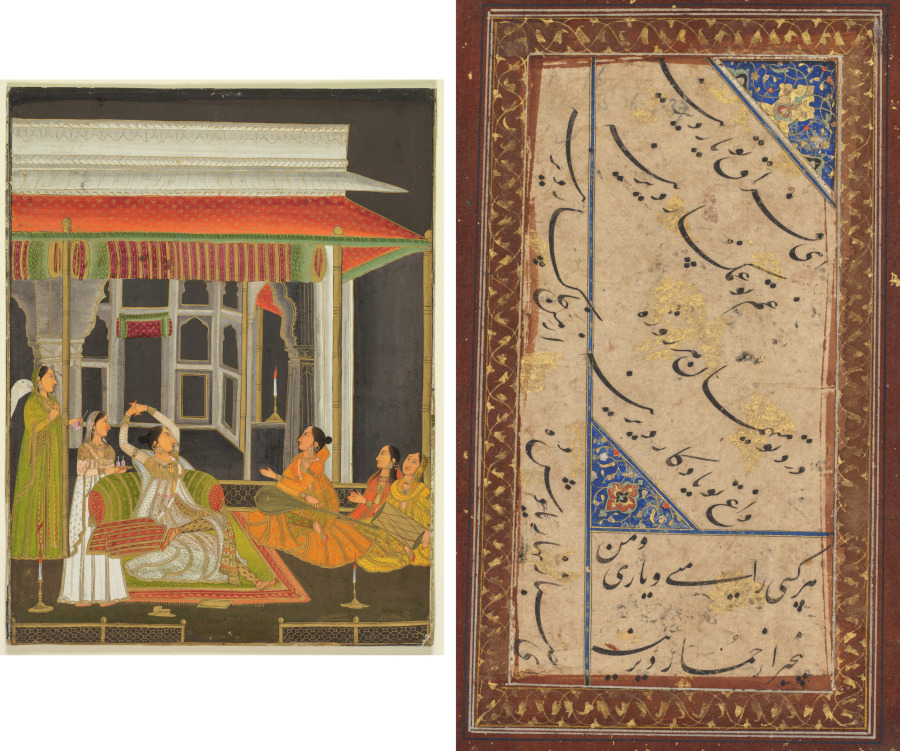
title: A princess on a terrace with attendants at night (recto); Calligraphy (verso)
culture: India, Farrukhabad, Mughal, 18th century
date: c. 1760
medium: Gum tempera, ink, and gold on paper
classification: Painting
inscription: verso: six lines of Persian poetry in nast 'aliq calligraphy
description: Before a terrace pavilion in the women’s quarters of a palace, a royal woman stretches to show off her figure in accordance with age-old Indian poetic imagery. Female musicians provide entertainment, and attendants hold bottles of wine at the ready. Scenes of enjoyment in sumptuous domestic spaces pervaded the artistic repertoire of the imperial court and regional centers of northern India throughout the late 1700s, following the themes set by the Mughal emperor Muhammad Shah.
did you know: Rolled-up textiles could be let down to enclose the space of an open pavilion.